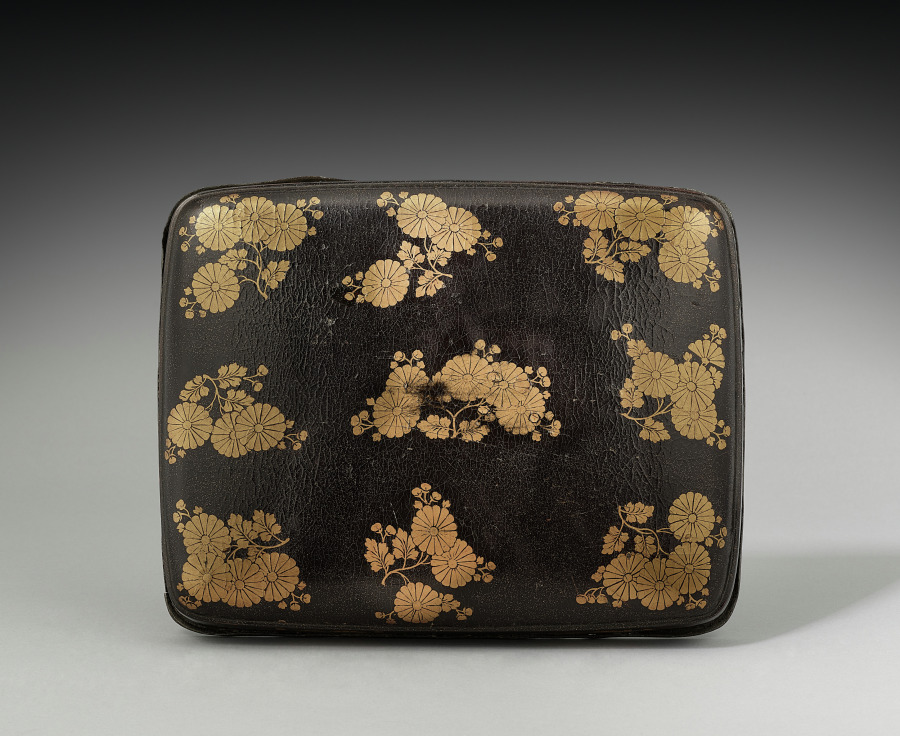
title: Cosmetics Box with Chrysanthemums (lid)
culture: Japan, Kamakura period (1185–1333)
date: early 1300s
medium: lacquer on wood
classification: Lacquer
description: In China, the chrysanthemum was historically appreciated for its association with the Double Nine Festival and the reclusive life of the poet Tao Yuanming (AD 365-427). In Japan, the 16-petaled chrysanthemum came to symbolize the Japanese imperial family after Emperor Gotoba (1180-1239) chose the motif as his personal emblem, having it applied to his sword and everyday utensils. This box proves that the flower also appeared on lacquer wares as early as the Kamakura period.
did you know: In Japanese, this type of small box is called a tebako, literally a hand box, and was typically part of a cosmetics set.